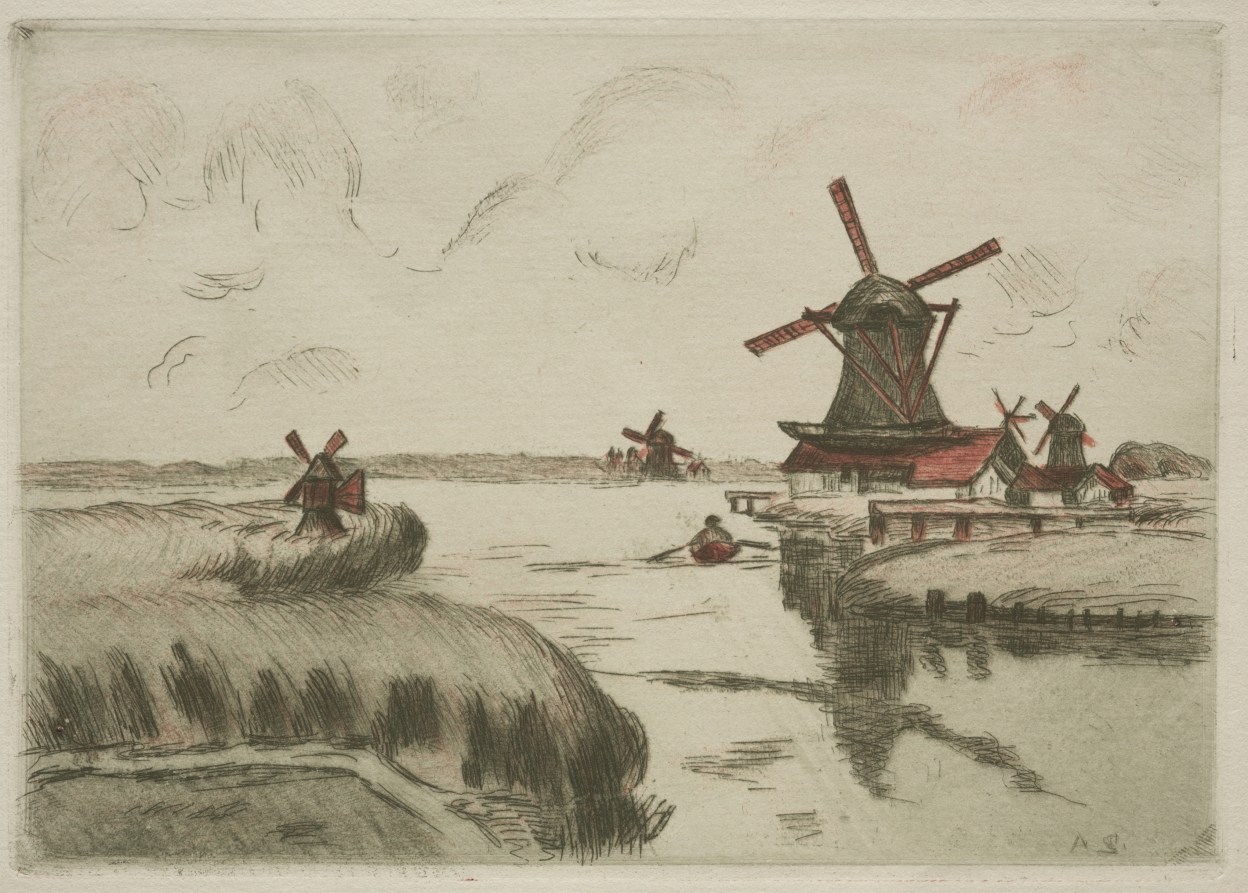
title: View from Saardam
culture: France, early 20th Century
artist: Armand Guillaumin (French, 1841–1927)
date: 1909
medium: color etching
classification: Print